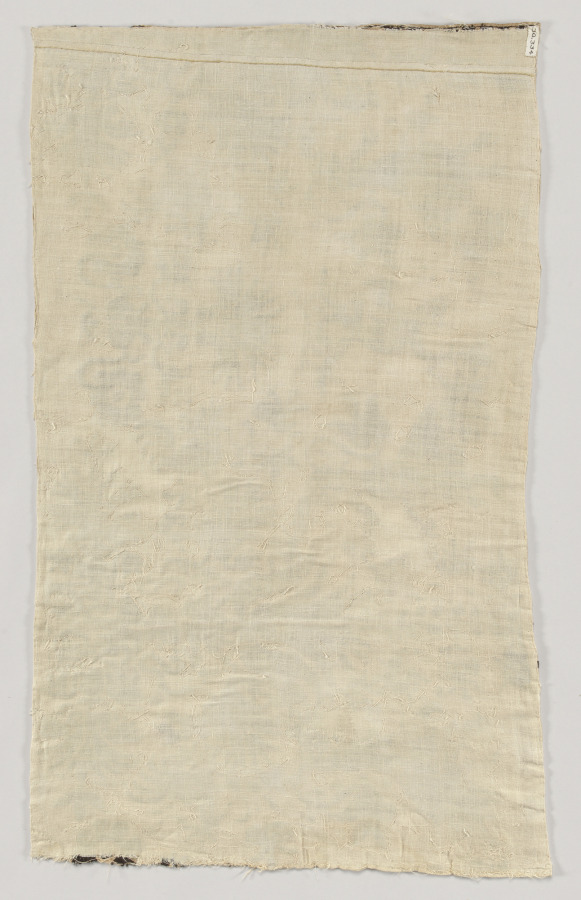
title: Embroidery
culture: Spain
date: 1700s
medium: embroidery; wool and silk thread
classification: Embroidery